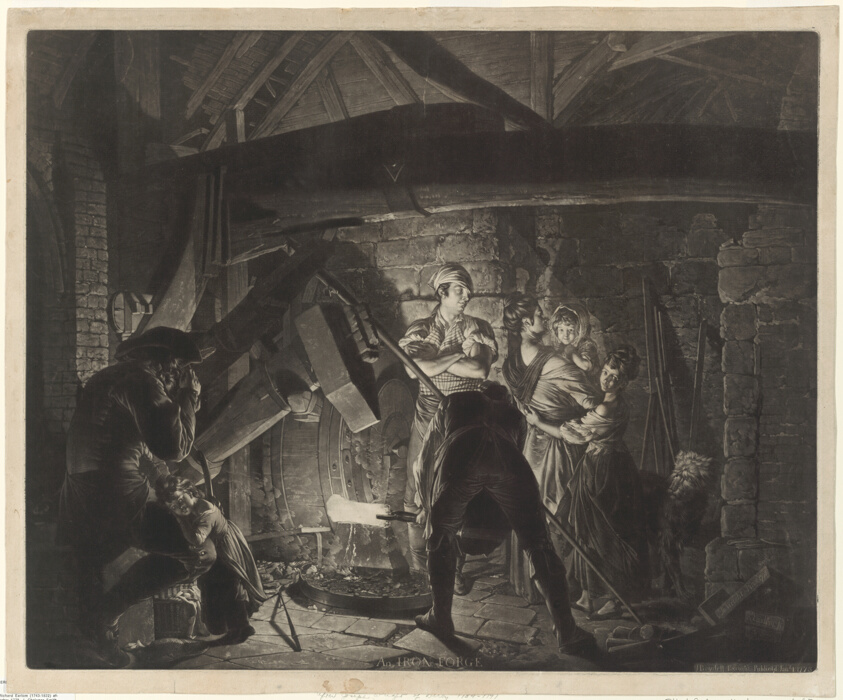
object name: Print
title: An Iron Forge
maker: Richard Earlom (British, 1743-1822); after Joseph Wright of Derby (British, 1734-1797)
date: 1773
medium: Mezzotint with traces of engraving in black on cream laid paper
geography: England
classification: mezzotint; print; prints and drawing